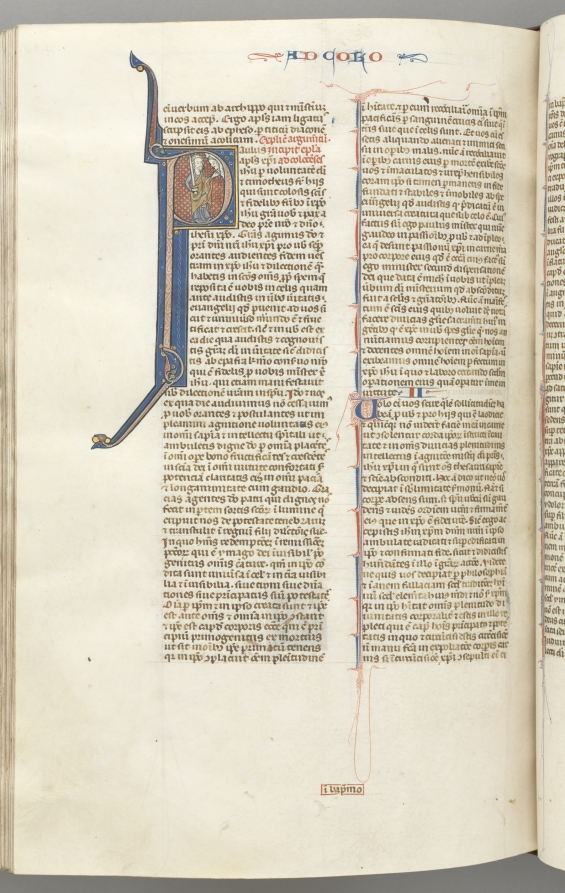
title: Fol. 453v, Colossians, historiated initial P, Paul standing talking to the bust of God above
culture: Southern France, Toulouse(?), 13th century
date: c. 1275–1300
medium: ink, tempera, and gold on vellum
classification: Bound Volume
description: Biblical manuscripts were highly prized and important possessions of churches, monasteries, cathedral schools, and universities throughout medieval Europe. The biblical texts were known as the vulgate, the translations made by Saint Jerome in the fourth century from Hebrew and Greek into Latin, which became the definitive and official Latin version of the Roman Church. In the 13th century, the bible was, for the first time, produced as a single volume with an officially sanctioned sequence to its books and chapters as illustrated by this example. The very extensive decoration of this bible is arranged hierarchically to indicate the relative importance of the various texts so that full or almost full-page initials mark the openings of the first prologue, Genesis, and the first Gospel; historiated initials mark the beginning of each book and illuminated initials mark the Prologues.